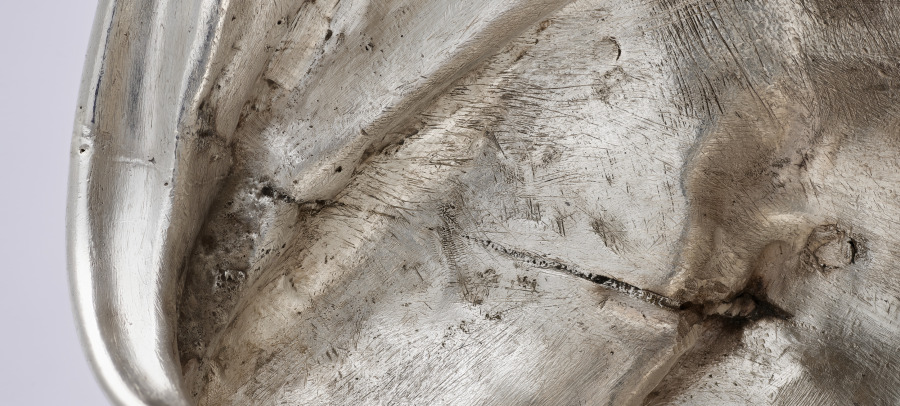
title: Tureen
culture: France, Paris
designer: Juste-Aurèle Meissonnier (French, 1695–1750)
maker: Pierre-François Bonnestrenne (French)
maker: Henry Adnet (French, 1745)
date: 1735–38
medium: silver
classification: Silver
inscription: engraved Meissonnier signature.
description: See entry for cover record 1977.182.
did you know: The langoustine, pigeon, and vegetables were cast using real examples giving the silver copies lifelike detail and appearance.